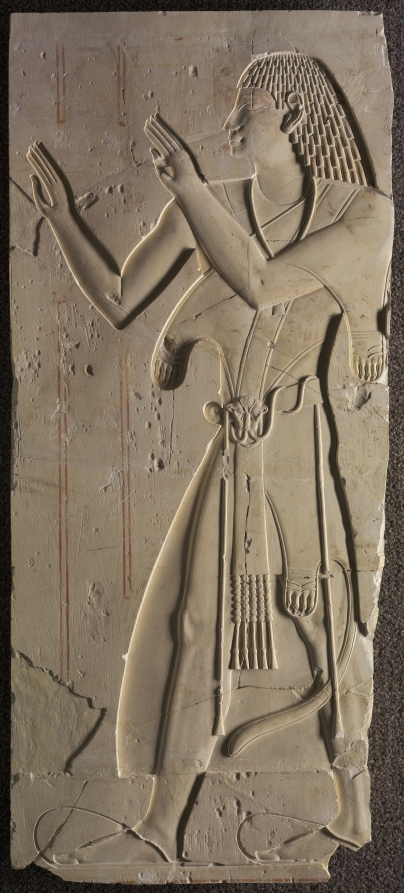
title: Mentuemhat in Ecclesiastical Dress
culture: Egypt, Late period (715–332 BCE), Dynasties 25–26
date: c. 667–647 BCE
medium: limestone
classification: Sculpture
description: Mentuemhat is in ecclesiastical dress in adoration before a deity. While the relief is almost finished, the paint was never applied and the inscriptions that were to go within the red columns were not even outlined.